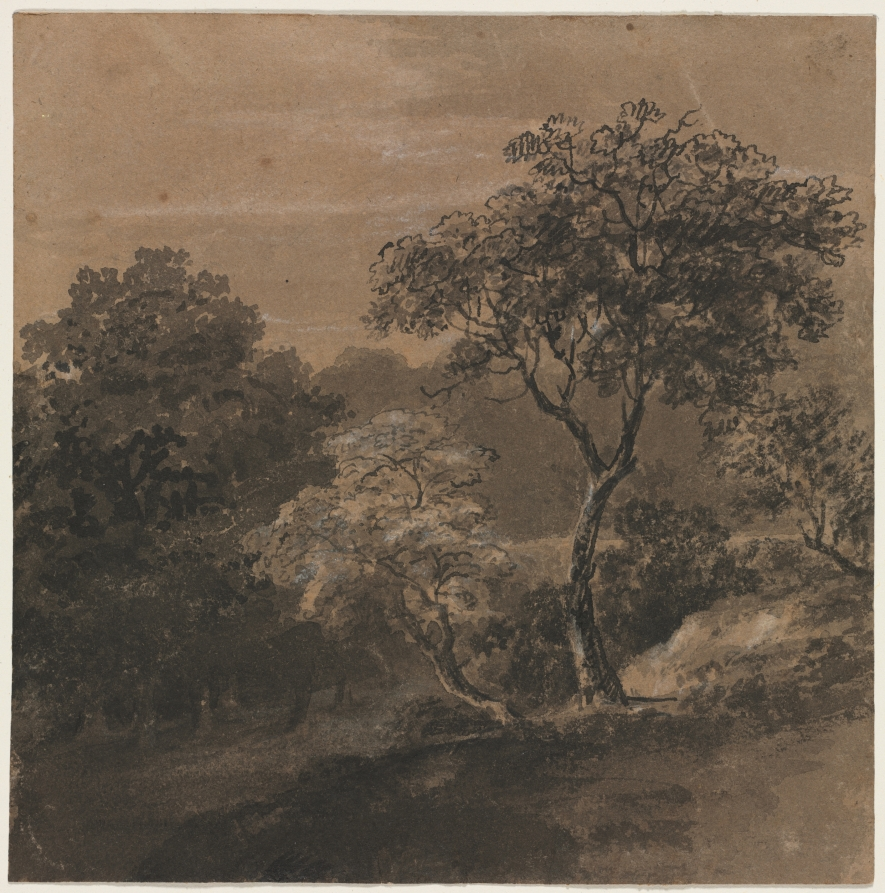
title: Landscape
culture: England, 19th century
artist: George Vincent (British, 1796–1831?)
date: c. 1816–31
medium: brush and wash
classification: Drawing